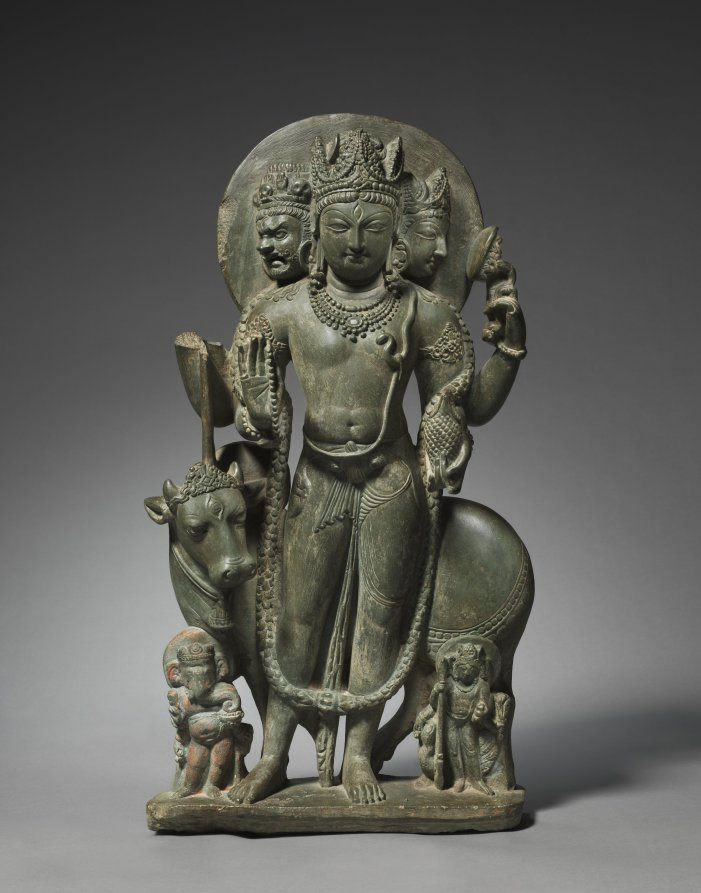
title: Standing Shiva Mahadeva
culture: Northern India, Kashmir, 8th century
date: 700s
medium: schist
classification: Sculpture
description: This early iconic form of Shiva as the Great God, or mahadeva, embodies his contradictory aspects. Shiva is both a yogi who lives outside of society and a king who rules the world. His yogic qualities can be seen in the matted locks of hair and the cobra that girds his torso, yet he wears a king’s crown. The forward-looking face of Shiva embodies his sovereignty. He grants freedom from fear with the gesture of his upraised right hand; his lowered left hand holds a citrus fruit, used in temple worship. His feminine aspect embodies features associated with creation and nurturing. She emanates as his wife Parvati, here seen as his left face. His right head is Bhairava, whose fearsome face embodies Shiva’s powers of destruction. His two sons, the elephant-headed Ganesha and the warrior Skanda, stand at his feet. Shiva’s vehicle, the bull Nandi, turns his head with a determination in all three of his eyes, which mirror the three eyes of Shiva.